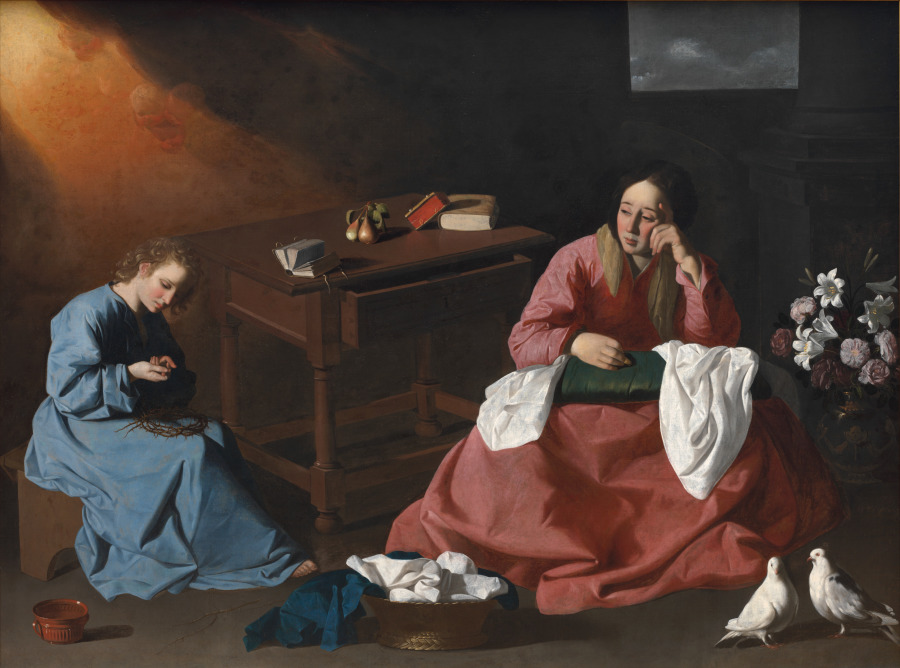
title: Christ and the Virgin in the House at Nazareth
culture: Spain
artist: Francisco de Zurbarán (Spanish, 1598–1664)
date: c. 1640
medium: oil on canvas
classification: Painting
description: Stories of Christ’s childhood and adolescence became increasingly popular during the Counter-Reformation because they were easily understood by a broad public. Rather than taking a story from the Bible, Zurbarán appears to have invented this subject, in which Jesus pricks himself on a crown of thorns he is weaving, foretelling his later torment at the Crucifixion. Despite the grand scale and monumental figures, the work has remarkable intimacy and quietness, emphasizing such details as the Virgin’s tears.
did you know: Zurbarán, also a still-life painter, tilts the tabletop to emphasize the symbolic books and fruit.